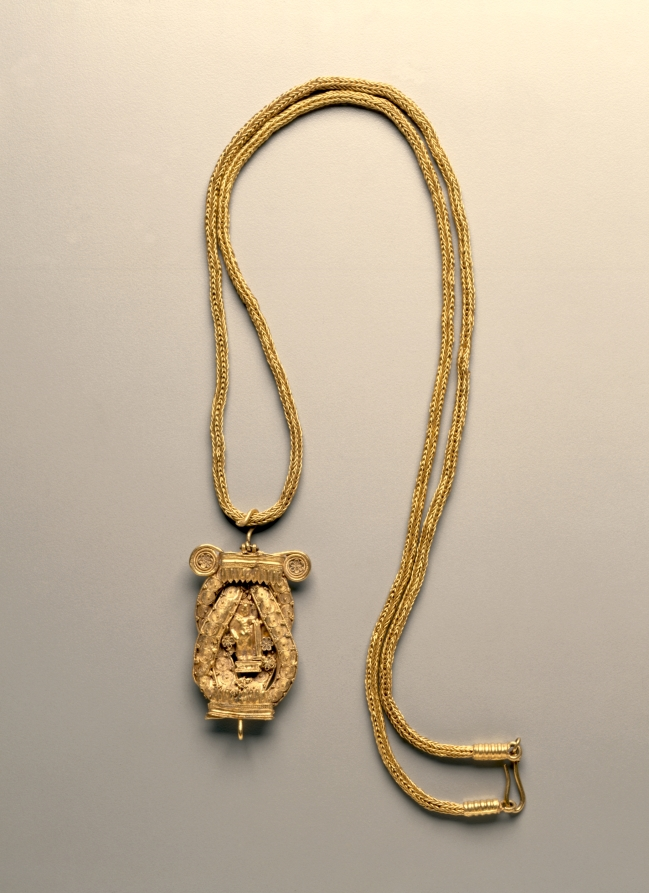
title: Chain and Pendant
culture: Greece, Hellenistic period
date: 200s BCE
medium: gold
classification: Jewelry